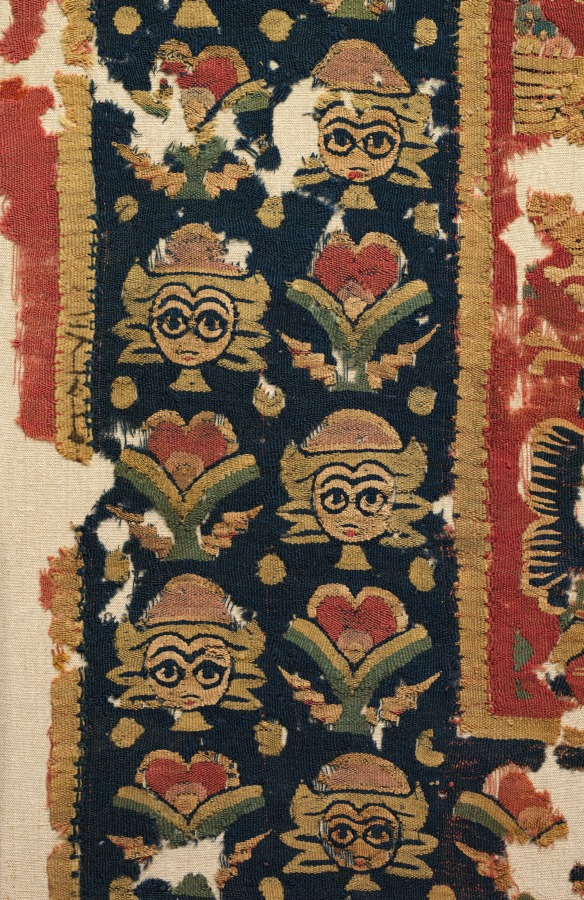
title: Fragment of a Large Hanging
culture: Egypt, Antinoë, Byzantine period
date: 500s CE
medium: tapestry weave (with plain tabby borders): wool and linen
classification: Textile